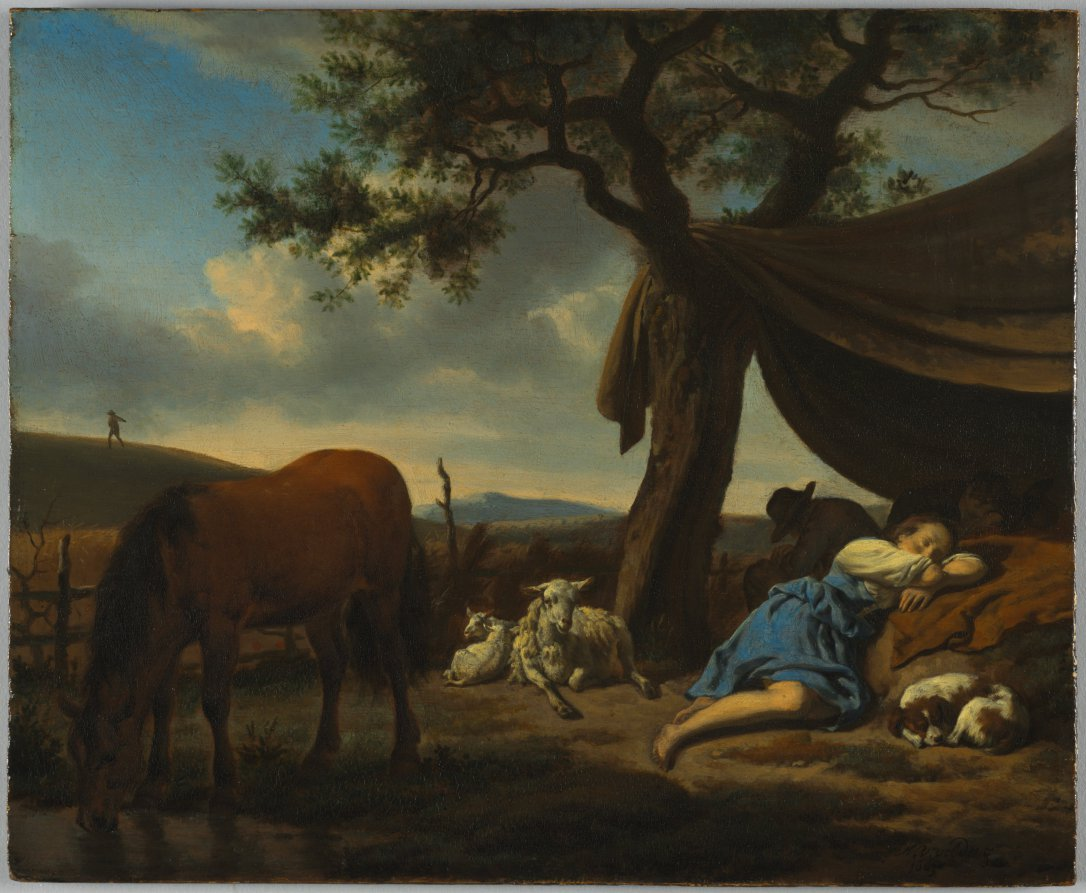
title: Sleeping Shepherds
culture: Netherlands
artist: Adriaen van de Velde (Dutch, 1636–1672)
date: 1663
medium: oil on wood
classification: Painting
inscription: Signed lower right: "A.v.Velde. f / 1663"